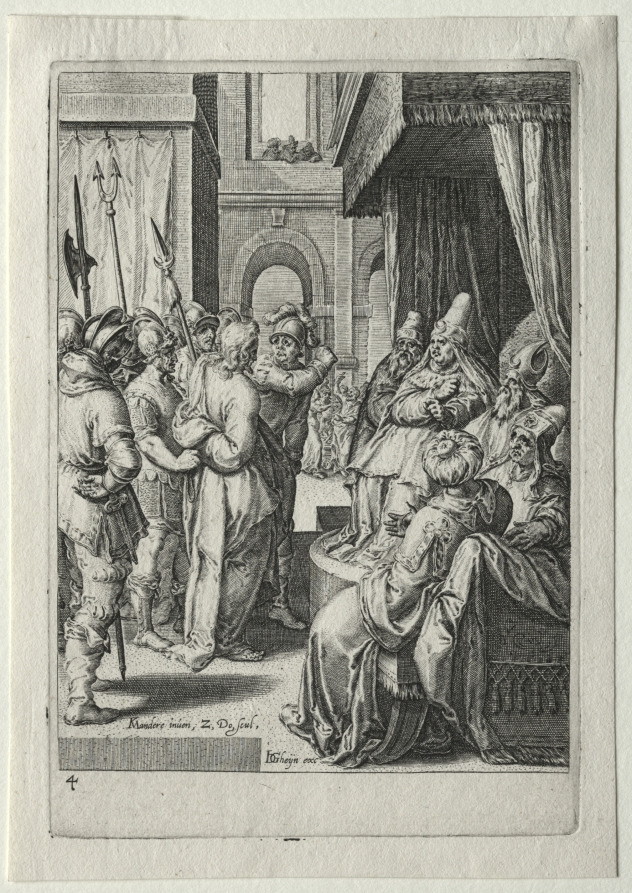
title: Passion Set: Christ before Herod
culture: Netherlandss, 16th century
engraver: Zacharias Dolendo (Dutch, 1561–1604)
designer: after Karel van Mander I (Dutch, 1548–1606)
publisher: Jacob de Gheyn II (Netherlandish, 1565–1629)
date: 1596–98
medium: engraving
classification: Print